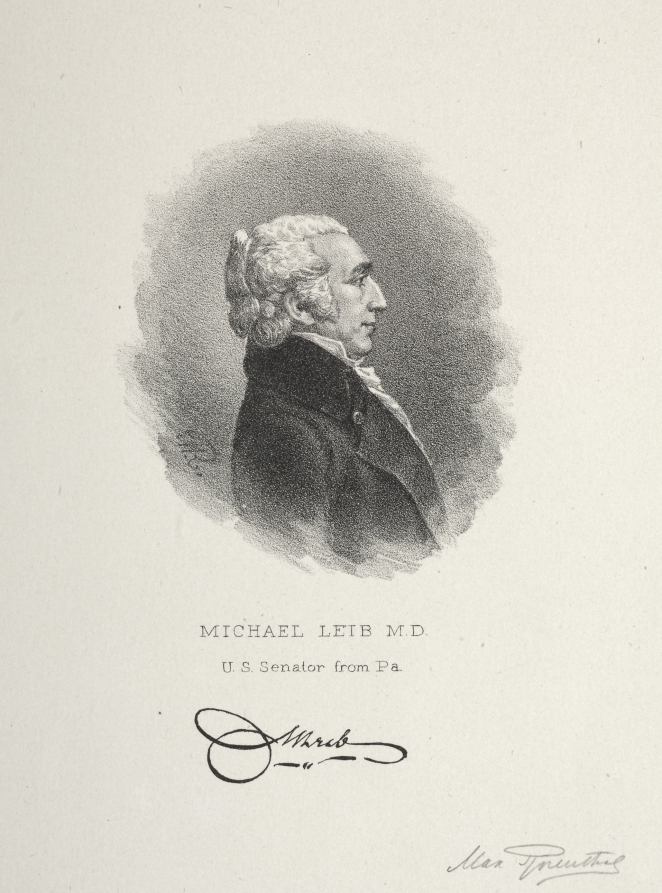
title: Michael Lieb, M. D.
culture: America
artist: Max Rosenthal (American, 1833–1918)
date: c. 1900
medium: lithograph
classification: Print